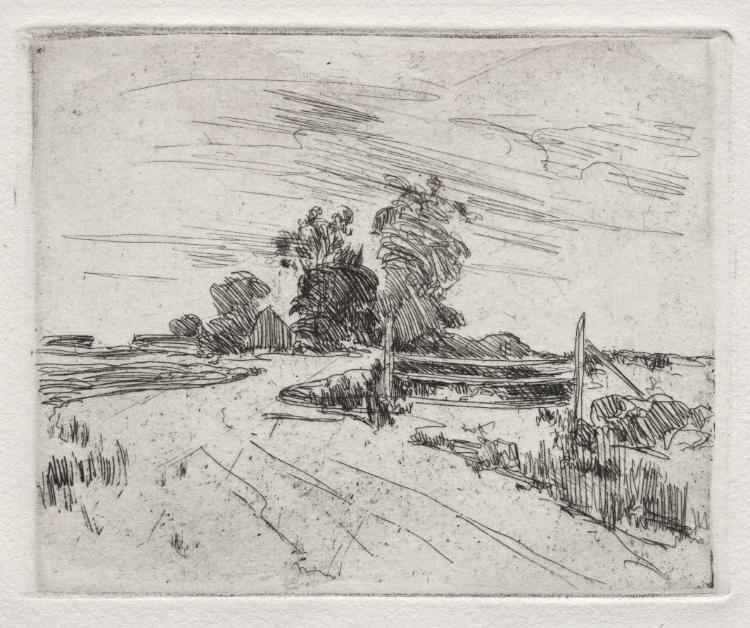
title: Branchville, Connecticut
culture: America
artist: John Henry Twachtman (American, 1853–1902)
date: c. 1880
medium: etching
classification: Print